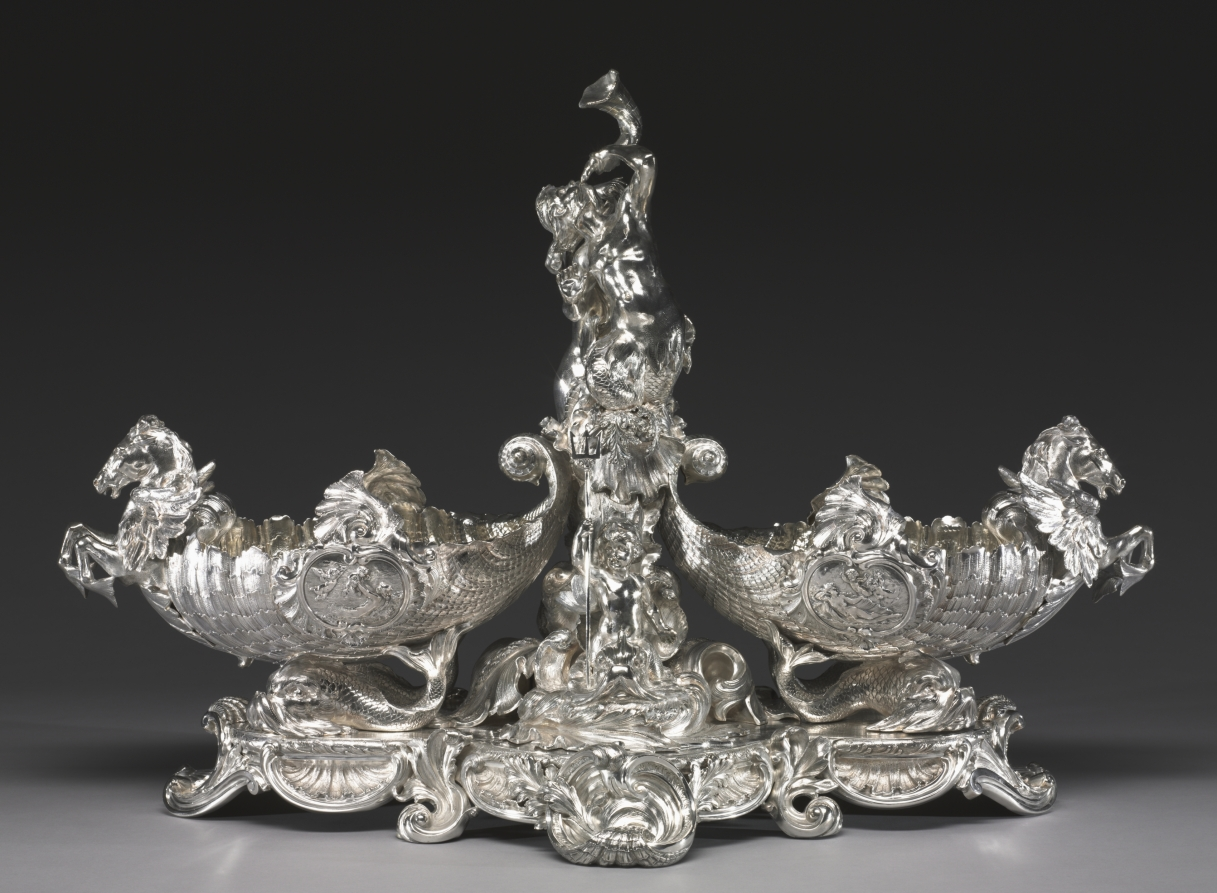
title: Centerpiece from the Nereid Service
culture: England, late 19th-early 20th century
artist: Goldsmith's & Silversmith's Company (British)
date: c. 1900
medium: silver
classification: Silver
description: Originally thought to have been made by the early 19th-century London silversmith Paul Storr because it had been marked with spurious Storr hallmarks, more recent scholarship has revealed that this service, representing the triumph of Great Britain on the high seas through the allegorical images of Grecian nymphs (nereids), was actually made to display at the 1900 world's fair in Paris. Such nationalistic fervor permeated design at the turn of the 20th century, especially in the years leading up to the First World War, when national pride was brought to its heels in Europe through a devastating conflict.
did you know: This centerpiece is actually the product of many hands since the Goldsmiths' and Silversmiths' Company operated as a cooperative of silversmiths who sold their work through the company.